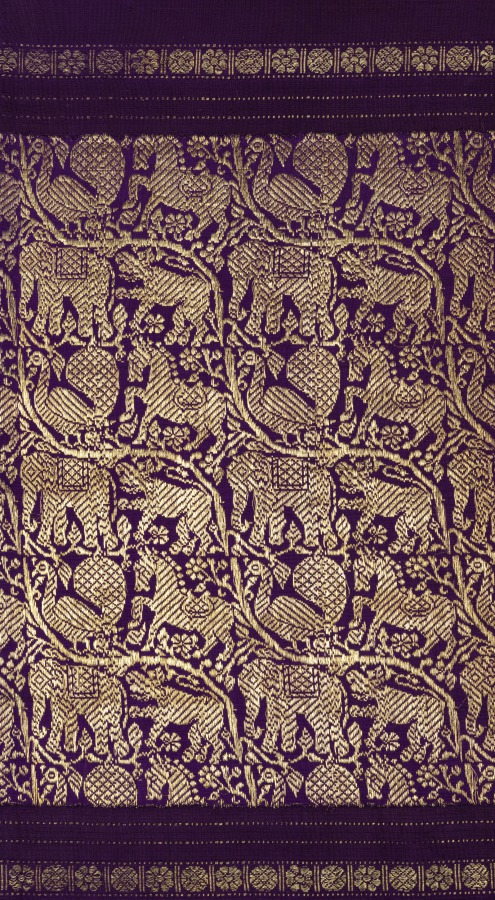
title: Sari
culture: India, Benares, 19th century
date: 1800s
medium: silk and gold brocade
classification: Textile